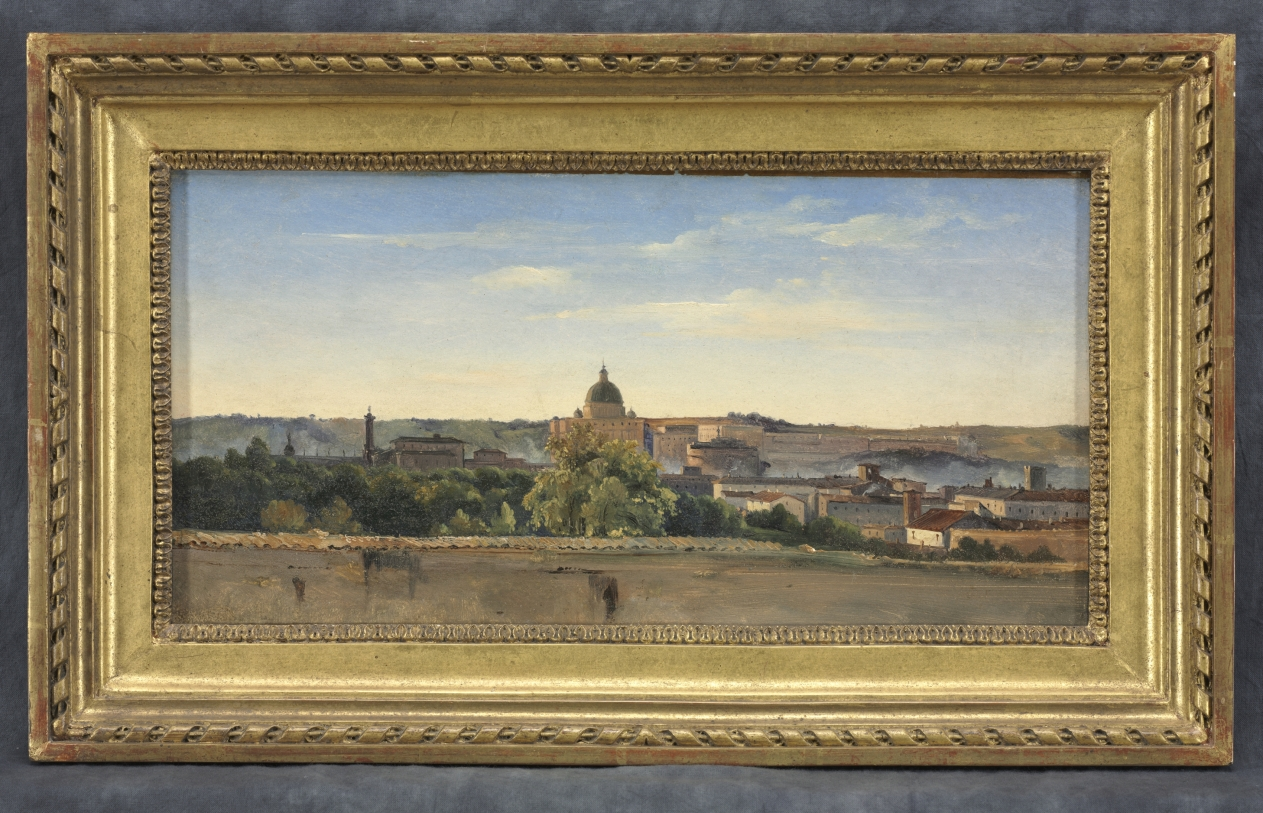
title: View of Rome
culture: France, 18th century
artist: Pierre Henri de Valenciennes (French, 1750–1819)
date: c. 1782–1784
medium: oil on paper, mounted on board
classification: Painting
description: This oil sketch showing St. Peter's Basilica in the distance was painted during the artist's stay in Rome, 1777–85. Its spontaneity and freshness is typical of the artist's outdoor paintings, in which he sought to capture the light and atmosphere of Rome.